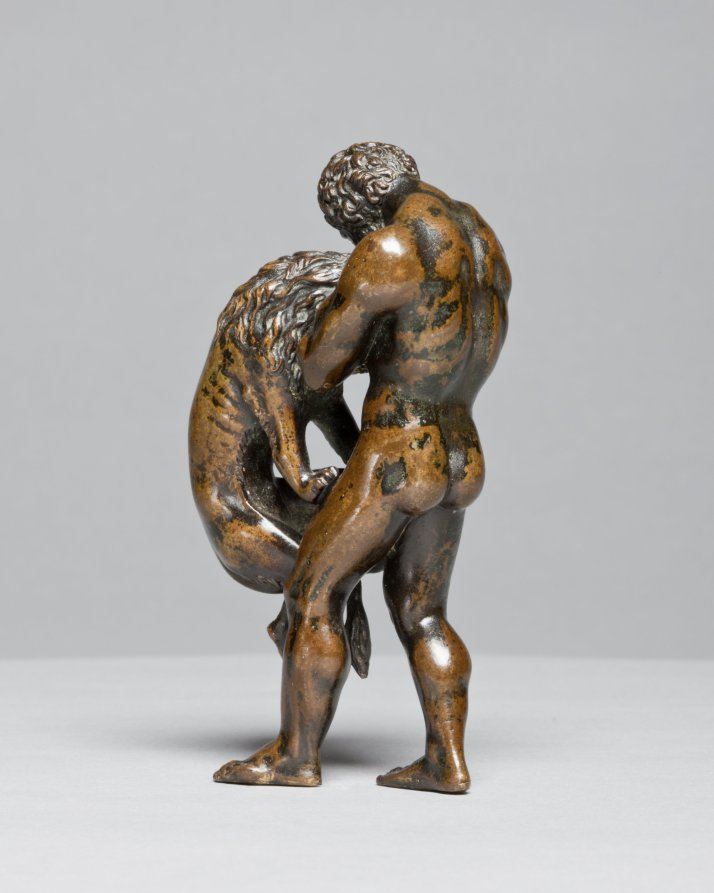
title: Hercules and the Nemean Lion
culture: Italy or France, 16th century or later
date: 1500s or later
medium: bronze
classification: Sculpture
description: The original owner of this work would have understood that this scene referred to the entire story of Hercules, the demi-god who had to accomplish twelve labors. The lion is named after the city of Nemea, near Corinth, a monstrous beast sent by the goddess Hera to wreak havoc on the area. After killing the lion, Hercules wore his pelt, commonly seen in other representations of the hero.